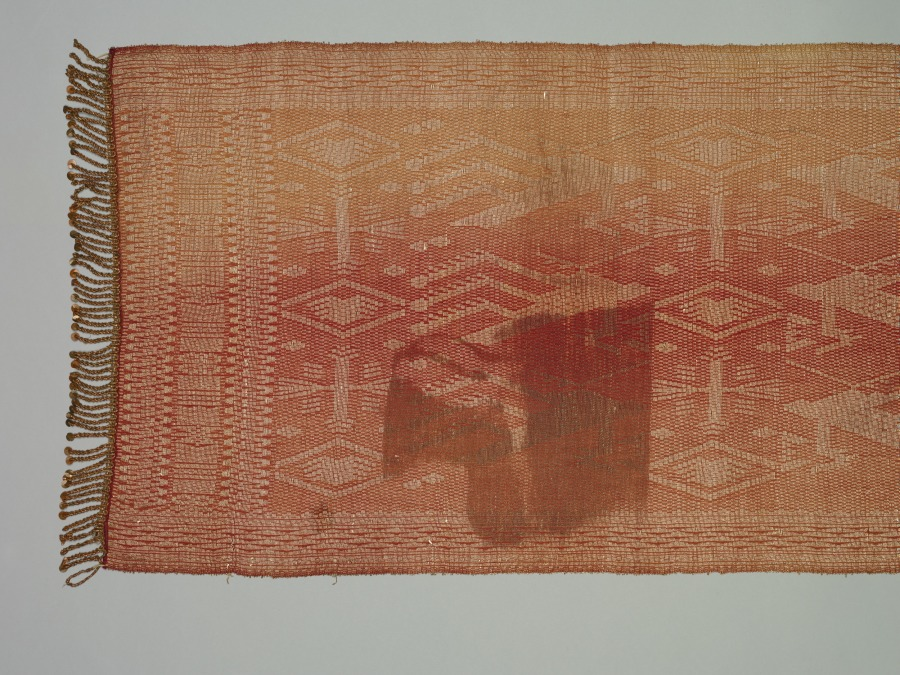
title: Brocade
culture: Indonesia, Sumatra, Minangkabau, late 19th century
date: late 1800s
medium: brocade; silk and metal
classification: Textile